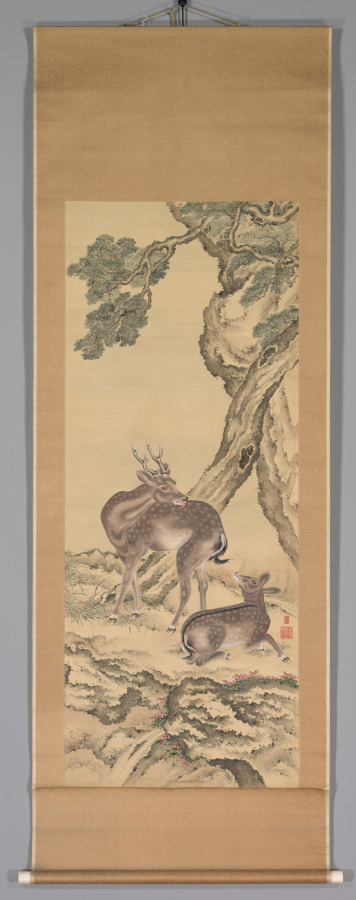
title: Symbols of Longevity: Deer under Peach and Pine (Peach) (left)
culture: Japan, Edo period (1615–1868)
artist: Toda Tadanaka (Japanese, 1761–1823)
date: 1801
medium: Pair of hanging scrolls; ink and color on silk (ivory roller ends)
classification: Painting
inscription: Lefthand painting signed: Kano no tori natsubi Fuji Gon'ei utsusu (Painted on a summer day in 1801 by Fuji Gon'ei) Lefthand painting sealed beneath signature: square red seal with patterned border above; Fujiwara, square red seal below; Tadanaka yajirushi Lefthand painting sealed lower left: rectilinear red seal unread